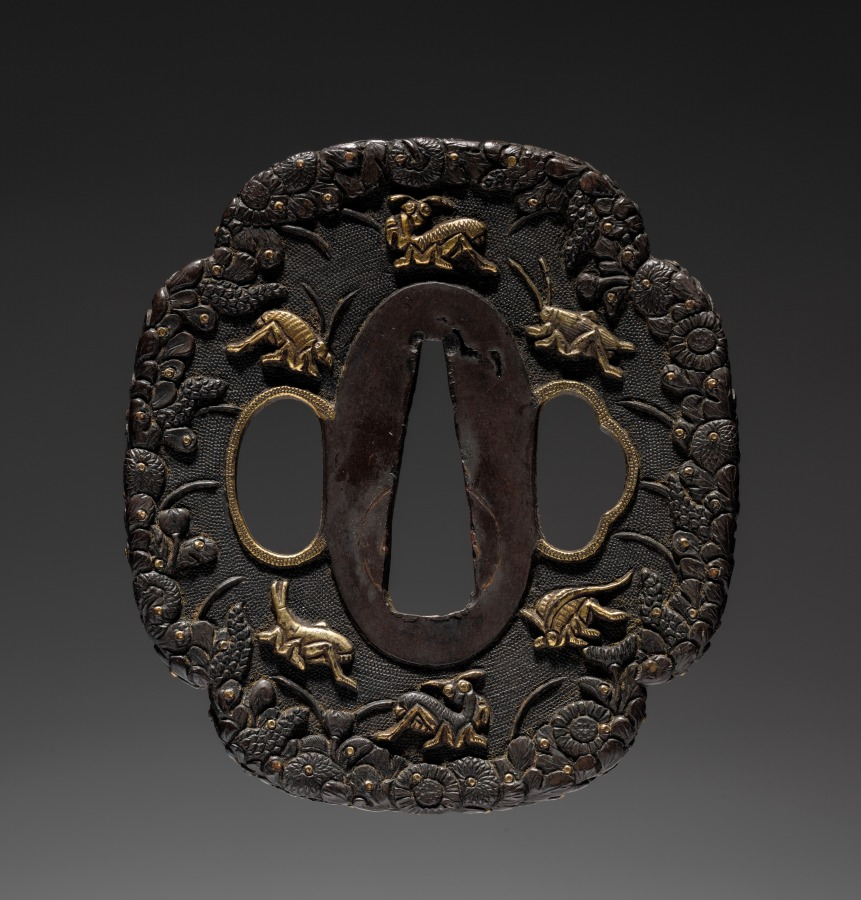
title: Sword Guard (Tsuba) with Crickets and Chrysanthemums in Dew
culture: Japan, possibly Edo period (1615–1868)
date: c. 1615–1868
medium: metal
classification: Arms and Armor